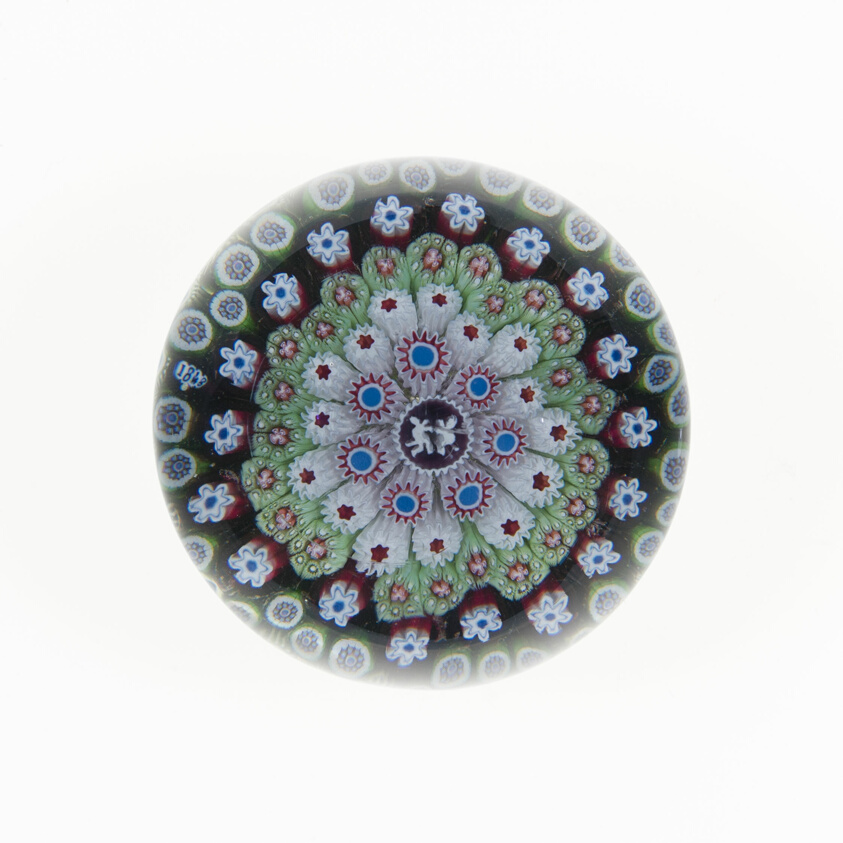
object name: Glass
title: Paperweight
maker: Saint-Louis Glassworks (Cristalleries de Saint-Louis); Lorraine, France, founded 1586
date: 19th century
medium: Glass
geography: Saint-Louis-lès-Bitche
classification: paperweight; millefiori; european decorative arts; glass